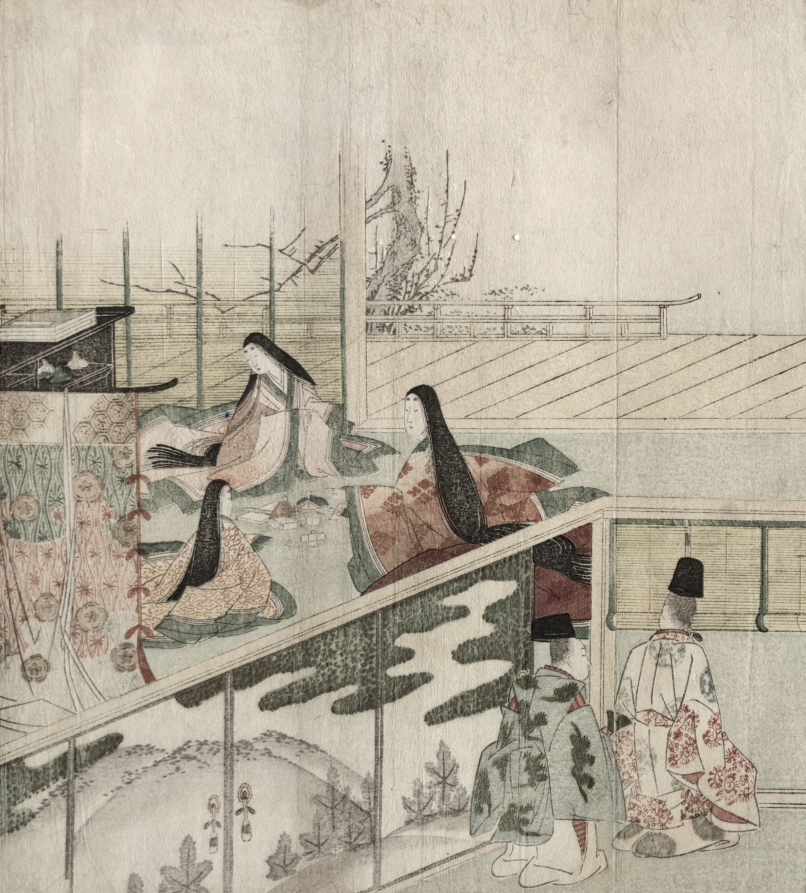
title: Court Ladies Making Dolls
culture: Japan, Edo period (1615–1868)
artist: attributed to Kubo Shunman (Japanese, 1757–1820)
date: 1790s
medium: color woodblock print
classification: Print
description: Since ancient times dolls were used in Japan for religious purposes, especially for the healing of impurities or illness. Mothers often presented dolls to shrines to secure the protection of kami (spirits) for their children. Each year there is a doll festival (Hina Matsuri) or Girl's Festival on March 3rd at which families display heirloom sets of dolls dressed in costumes of the ancient imperial court. This is a section of a surimono (a print in which an image is combined with poetry to celebrate a special event) or an album page.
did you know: Myrta Leonora Jones, the donor of this work, was a women’s rights activist in Cleveland in the early 20th century.